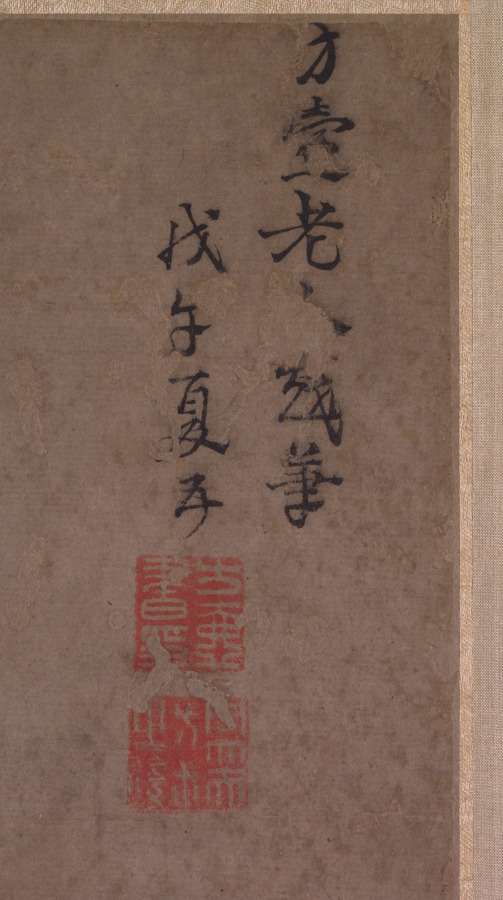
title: Landscape Ink-Play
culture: China, Yuan dynasty (1271-1368)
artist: Fang Congyi (Chinese, active c. 1340–80)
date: 1300s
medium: hanging scroll; ink and color on paper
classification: Painting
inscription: Inscription and 2 seals in the upper right. 2 complete seals and 1 partial in the lower left.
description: The painter created a paradoxical juxtaposition of the boat serenely sailing against the turbulent onrushing movement of the towering mountains in the background.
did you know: Fang Congyi was a painter and a Daoist priest.